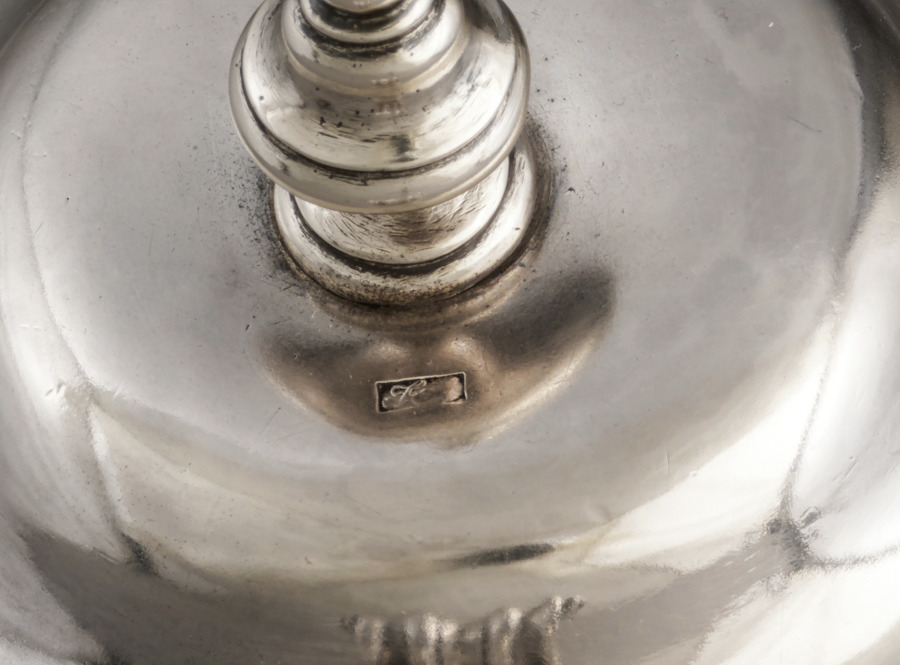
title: Tankard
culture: America, Rhode Island, Exeter and South Kingston, 18th century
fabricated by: Samuel Casey (American, c. 1724–c. 1780)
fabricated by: Thomas Arnold (American, 1734–1828)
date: c. 1750–1770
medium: silver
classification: Silver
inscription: engraved "G" over "W * I" in block letters on top of handle.